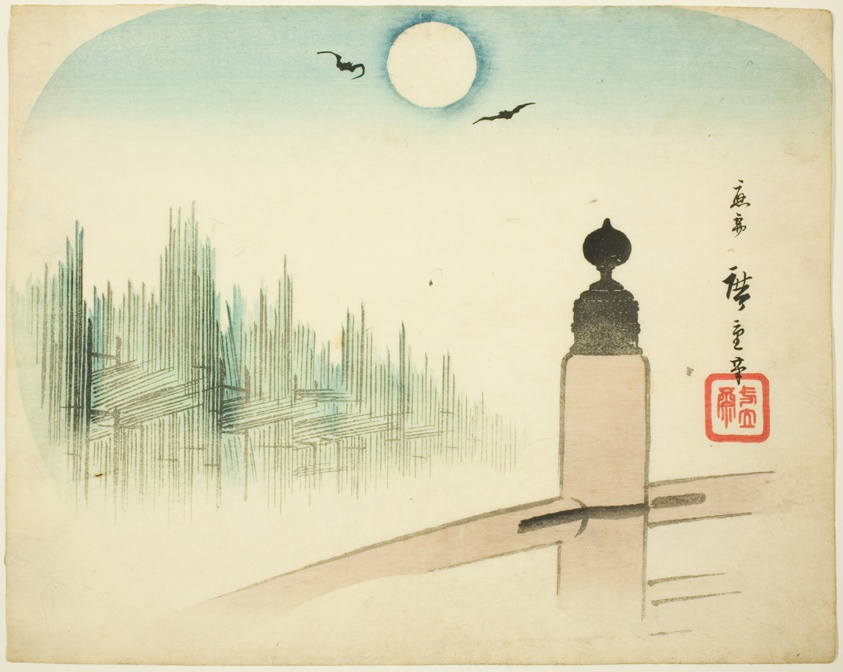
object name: Print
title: A View of Timber Yards from a Bridge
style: Japanese (culture or style)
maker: Utagawa Hiroshige 歌川 広重; Japanese, 1797-1858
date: c. late 1840s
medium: Color woodblock print; uchiwa-e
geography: Japan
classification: woodblock print; print; asian art